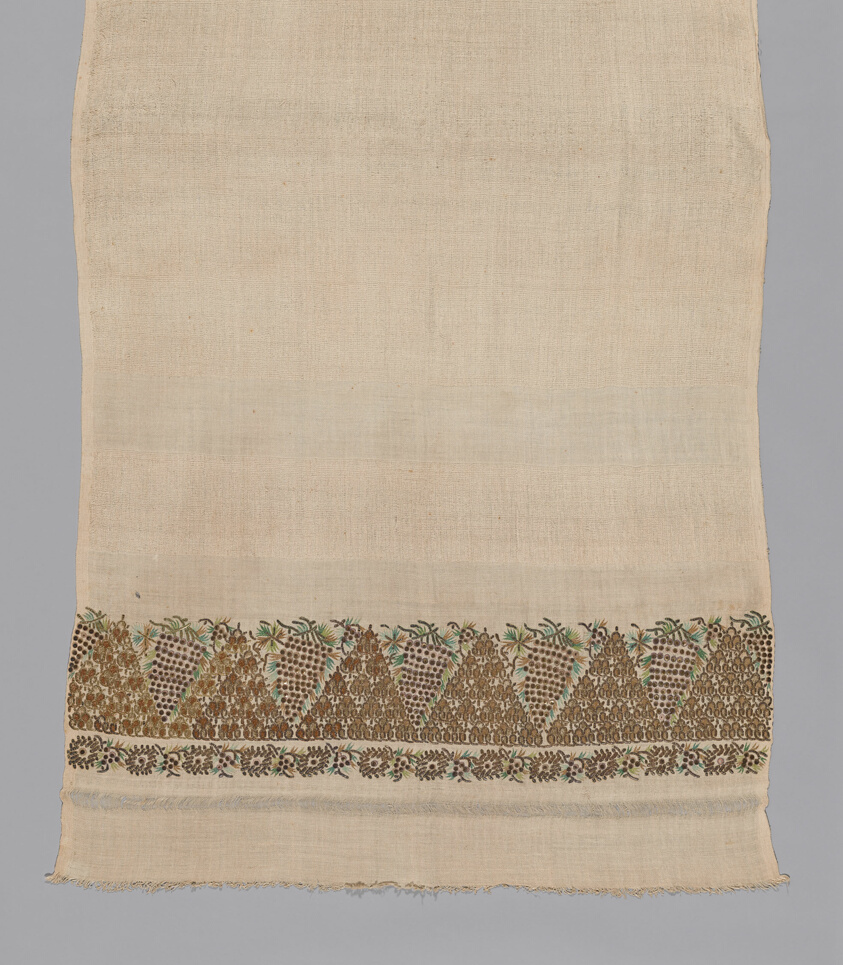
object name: Textile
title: Towel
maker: Turkey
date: 19th century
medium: embroidered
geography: Turkey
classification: textile; needlework (visual works); weaving